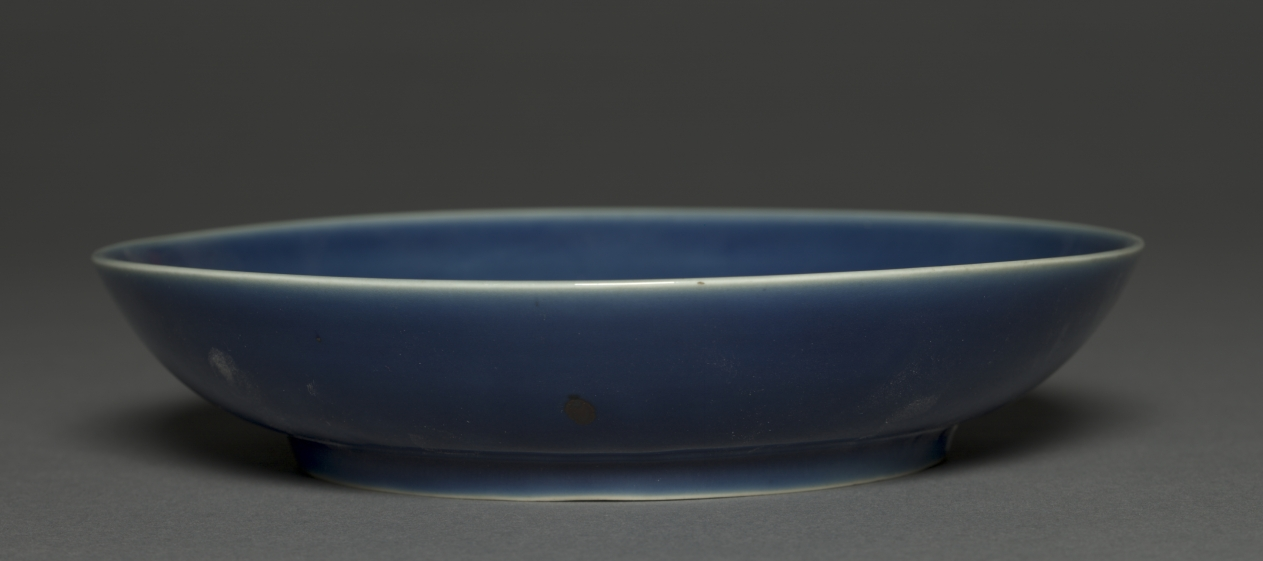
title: Dish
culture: China, Jiangxi province, Jingdezhen kilns, Ming dynasty (1368-1644), Wanli mark and reign (1573-1619)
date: 1573–1619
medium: porcelain with blue glaze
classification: Ceramic